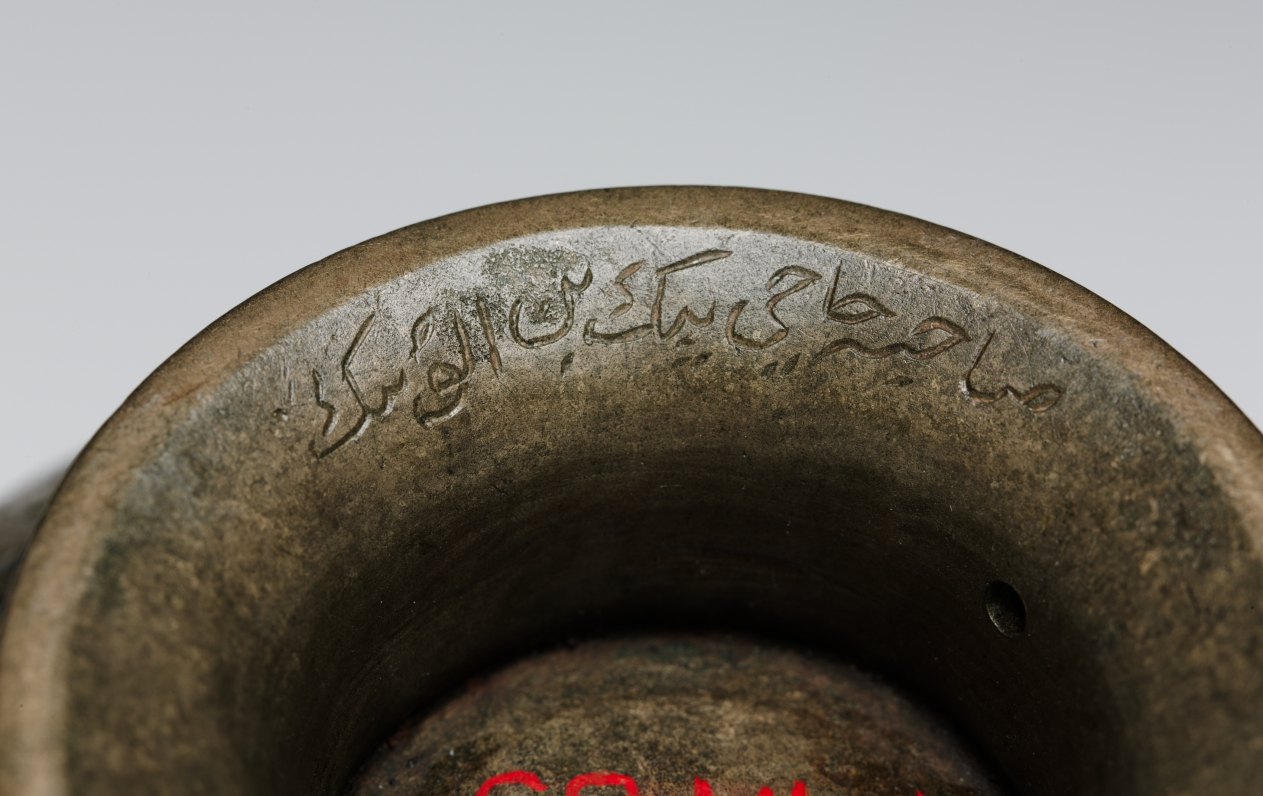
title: The Wade Cup with Animated Script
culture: Iran, Seljuq period of Iran (1037–1194)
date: 1200–1221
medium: brass inlaid with silver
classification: Metalwork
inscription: Glory, and success, and government, and bliss, and soundness, and peace of mind, and mercy, and well-being, and good health, and duration, and increase, and satisfaction, and care, and continuance to its owner.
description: The highlight of the cup’s decoration is the inscription around the rim, which you see on the walls around you, with letters composed of human figures, animals, and birds. This is known as animated script and it developed in northeast Iran or Afghanistan during the mid-1100s and migrated westward. The inscription on the rim of the Wade Cup is the pinnacle of this form of script with its full-figure animation. The body of the cup is covered with interlacing bands of compartments containing tiny figures of humans and animals. These represent the 12 signs of the zodiac from astrology, the practice of interpreting the influence of planets and stars on earthly affairs. Astrology began in Mesopotamia, was adopted by the Greeks, and then absorbed into medieval Islamic culture through translations of Greek texts.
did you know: This is known as the Wade Cup, after J. H. Wade who bequeathed the funds for its acquisition